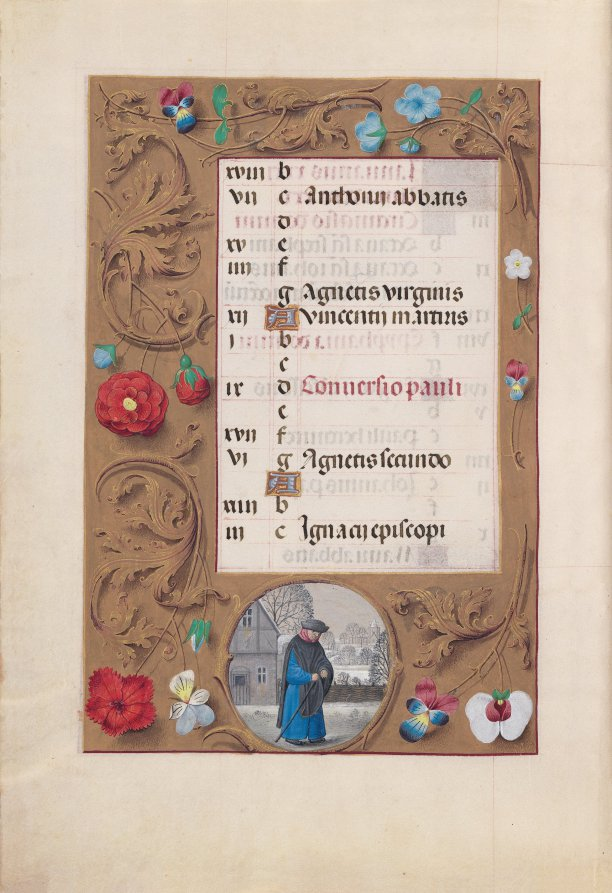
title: Hours of Queen Isabella the Catholic, Queen of Spain: Fol. 2v, January - Snow Landscape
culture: Flanders, Ghent and Bruges, late 15th century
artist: Master of the First Prayerbook of Maximillian (Flemish, c. 1444–1519)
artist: and Associates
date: c. 1500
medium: ink, tempera, and gold on vellum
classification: Bound Volume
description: This manuscript was illuminated by a circle of at least five highly organized manuscript painters active in the Flemish cities of Ghent and Bruges. The principal illuminator was Alexander Bening, who painted the majority of the book's miniatures. Manuscripts produced by this circle of artists are renowned for the decoration of their borders, which typically feature a rich variety of realistically painted flowers, birds, and butterflies. This prayer book, called a book of hours, was intended not for a cleric but for the private devotions of a lay person—in this case, Isabella the Catholic, Queen of Spain (1451–1504); her coat of arms embellishes the book's frontispiece. It is unlikely that the book was commissioned by the Queen herself; rather, she probably received it as a diplomatic gift from someone courting her patronage, perhaps Cardinal Francisco Jimenez de Cisneros. A Franciscan friar, Jimenez was dependent upon Isabella for his advancement, first to the post of Queen's confessor in 1492, and then to Archbishop of Toledo in 1495.